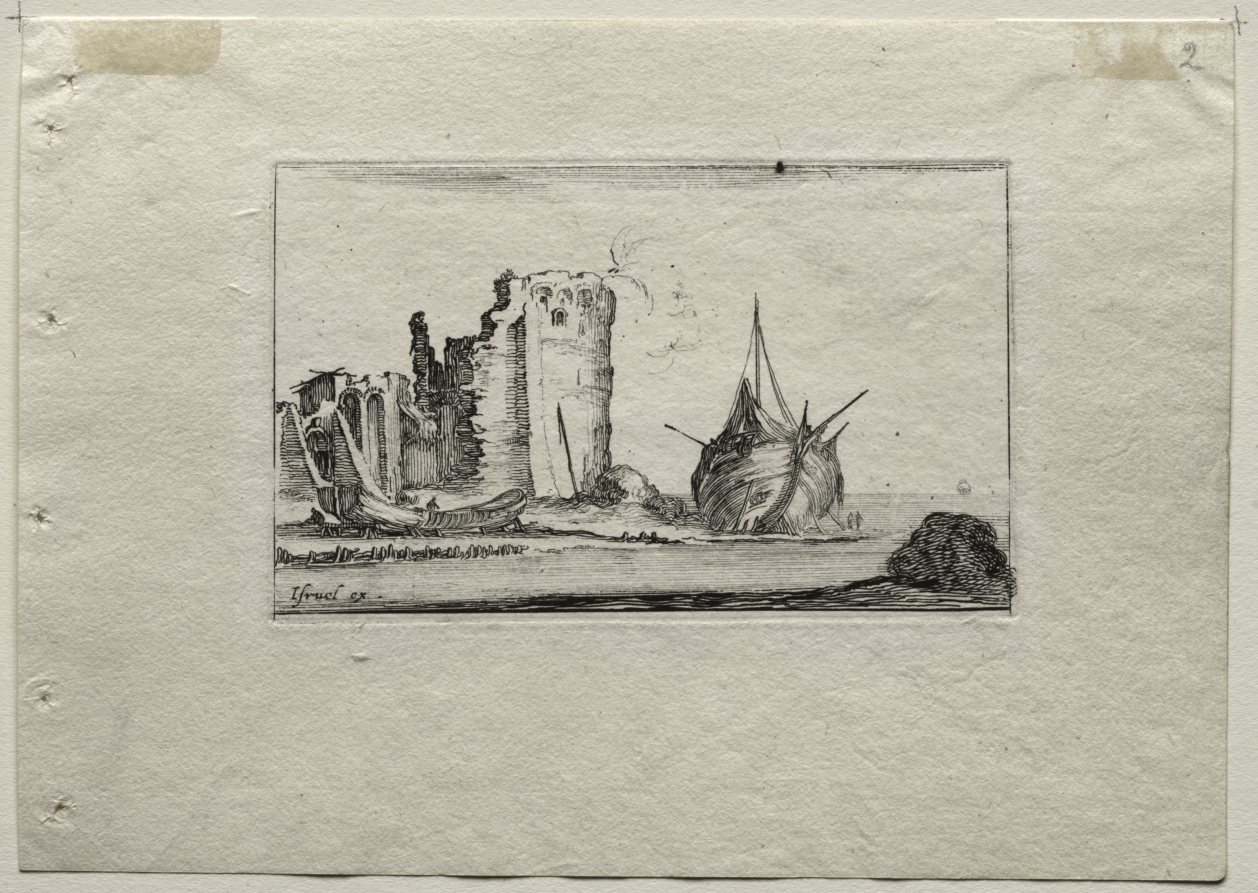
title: Caprices: Marine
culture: Italy, 17th century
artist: Stefano Della Bella (Italian, 1610–1664)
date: c. 1642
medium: etching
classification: Print